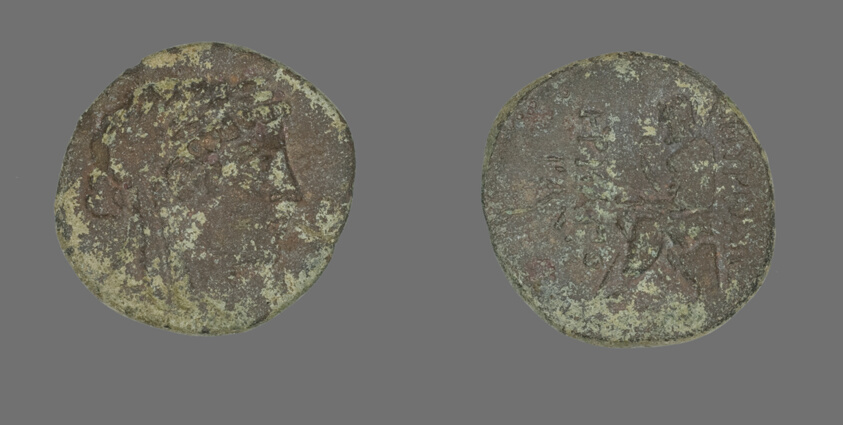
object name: Coin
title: Coin Depicting the God Apollo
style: greek, ancient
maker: Greek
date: 2nd-1st century BCE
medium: Bronze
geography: Ancient Greece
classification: coin; ancient art